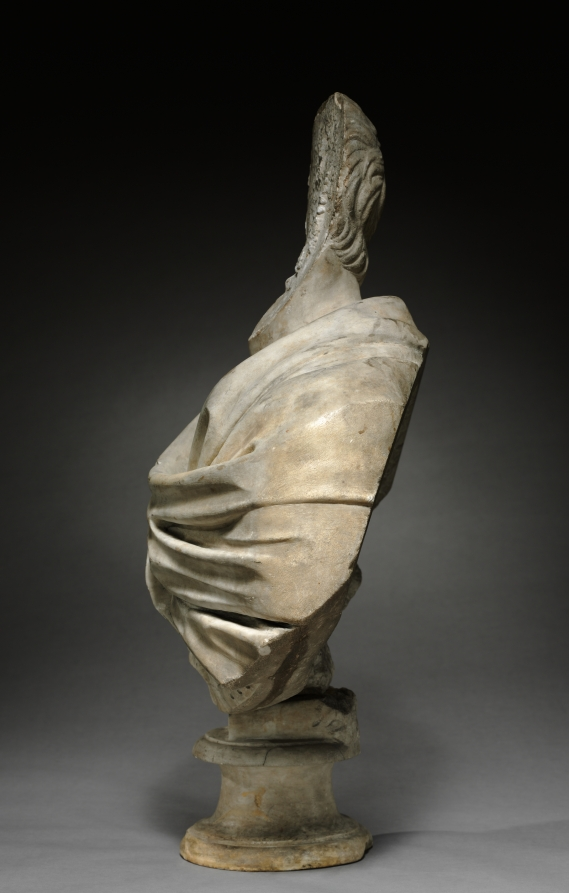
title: Bust of a Man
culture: Italy, Face: Roman, early 2nd century or later; Body: 16th century or later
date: Face: early 2nd century or later. Body: 1500s or later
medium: marble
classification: Sculpture